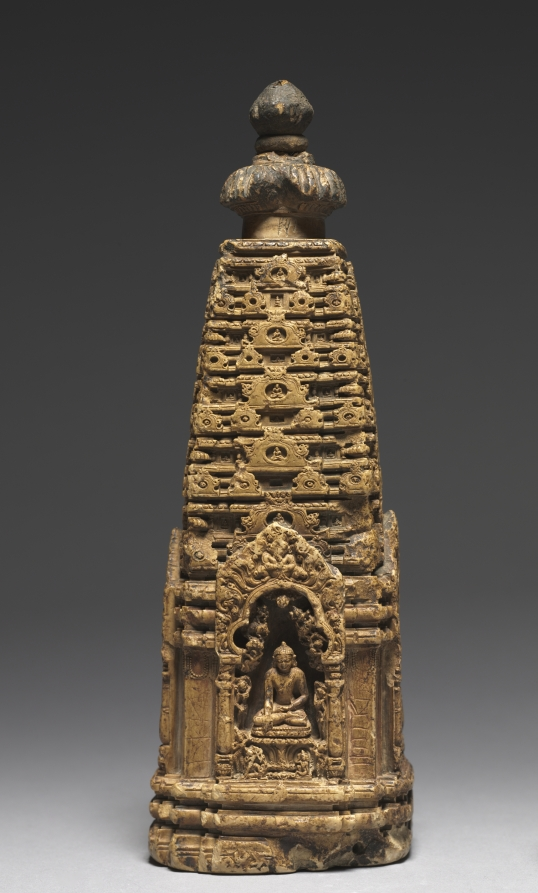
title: Portable Buddhist Temple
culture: Eastern India, Bihar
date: 900s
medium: Kaolin with traces of pigment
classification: Sculpture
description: The large niches on each side contain scenes from the life of the Buddha. The first features his mother Maya after his miraculous birth. The second and fourth depict his triumph over the forces of evil that attempted to frighten and seduce him away from the path to enlightenment. The third scene takes place after he has established a monastic following and depicts his wife bringing their son to meet him. Kaolinite is a compacted mineral that approximates ivory in its ability to be carved with fine details. Visitors to sacred Buddhist sites would commission portable sculptures such as this to commemorate their pious pilgrimage.